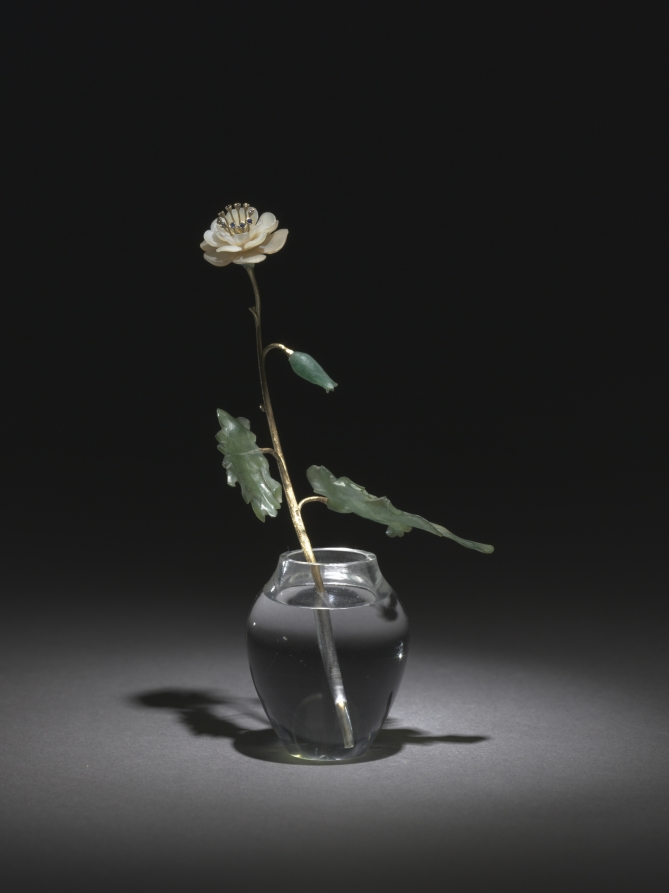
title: Flower Study of an Anemone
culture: Russia, St. Petersburg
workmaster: Henrik Wigström (Russian, 1862–1923)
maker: House of Fabergé (Russian, 1842–1918)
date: c. 1905–15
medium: mat white stone, gold, sapphires, jade, rock crystal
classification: Miscellaneous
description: This flower study depicts a wild anemone in bloom. Fabergé’s inspiration for his flower studies is said to have come from the floral brooches of precious stones that were made in the 1700s for Catherine the Great as well as from the Japanese art of flower arranging, known as ikebana. Small and delicate, Fabergé’s flower studies were given as intimate gifts to friends by the tsarina and others in the court. She also liked to take them around to wherever the imperial family was residing as a reminder of spring during the harsh Russian winters.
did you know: The stems of Fabergé’s flower studies are set into little basins carved from rock crystal to resemble pots of water.